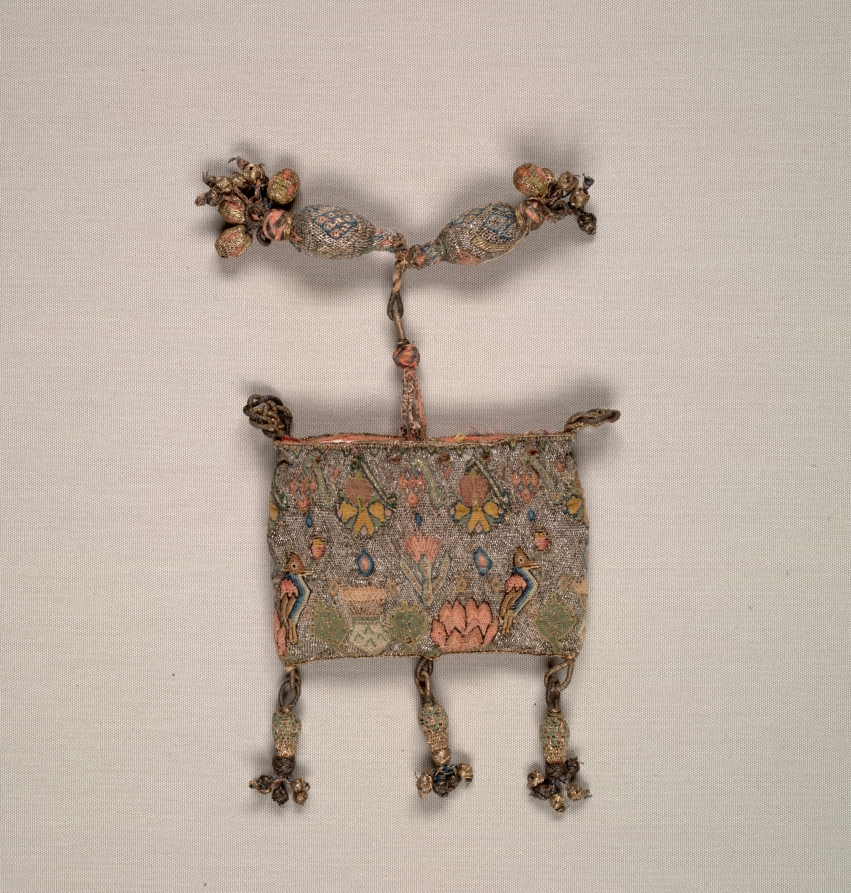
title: Purse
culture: England, early 17th century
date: early 1600s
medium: embroidery; silk and silver filé on linen ground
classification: Embroidery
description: According to Elizabethan embroidery scholar Jacqui Carey, this purse and its trimmings are typical of a ‘sweet bag’, though it is missing its handle and its drawstring is damaged. The term ‘sweet bag’ was popularized in George Wingfield Digby’s 1963 publication on Elizabethan embroidery; Digby used the term to describe small English purses dating from the 1500s and 1600s. The body of the purse is not the usual embroidered linen. Instead, it is a form of tubular warp-wrapping, a larger version of the structure and design found on tassels typical of the period. The body of the purse is made from a spiraling weft wrapped with multiple warp threads. It is assumed that it was made over a cylindrical form that was removed when the work was complete. The motifs are created by shifting the colored threads. Black silk warp threads that have since disintegrated expose the spiraling weft.